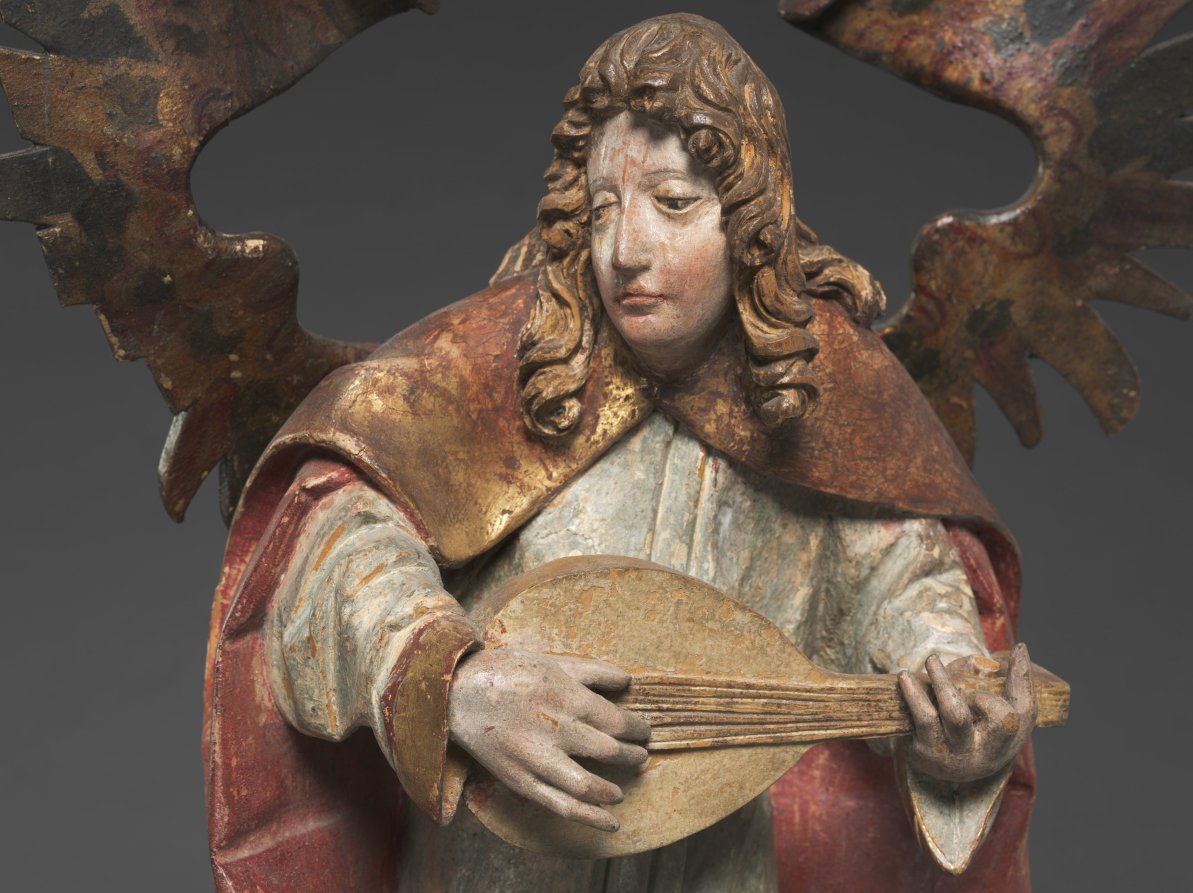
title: Lute-playing Angel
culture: Austria, Tyrol, early 16th Century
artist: Hans Schnatterpeck (Austrian)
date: made shortly after 1503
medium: Black Forest balsalm fir with polychromy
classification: Sculpture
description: This sculpture was originally placed at the top of the altarpiece of the high altar in the church at Nieder Lana, near Meran, in the South Tyrol (now part of present-day North Italy). The sculptor had contracted in 1503 to complete this altar within eight years for the payment of 1,600 gilders. Hans Schnatterpeck was originally from Landsberg am Lech in Bavaria. By 1478-79 he had settled in Meran where he operated the leading workshop in the area. This angel is a surviving element from his most famous work, the largest Gothic altarpiece of the Alpine region. Other elements survive in various public and private collections.